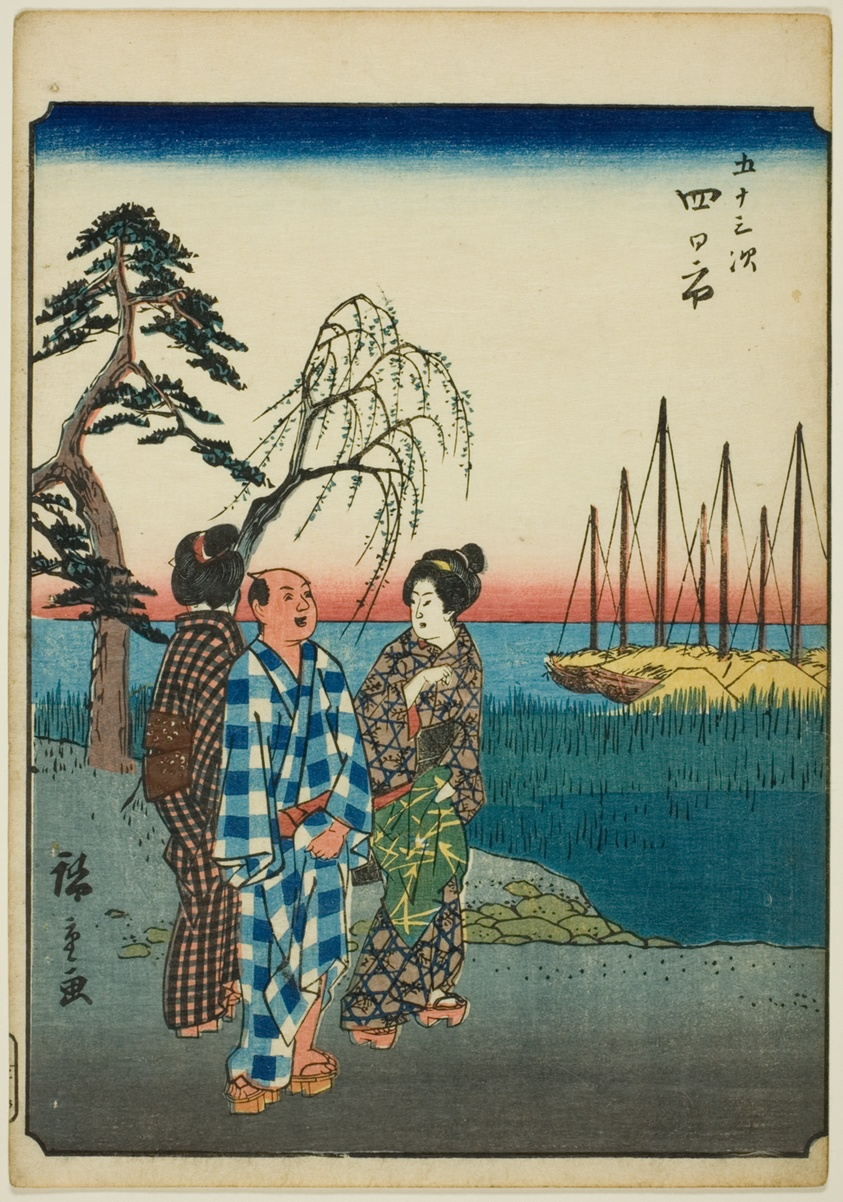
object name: Print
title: Yokkaichi, from the series "Fifty-three Stations [of the Tokaido] (Gojusan tsugi)," also known as the Figure Tokaido (Jinbutsu Tokaido)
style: Japanese (culture or style)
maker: Utagawa Hiroshige 歌川 広重; Japanese, 1797-1858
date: 1852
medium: Color woodblock print; chuban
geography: Japan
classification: woodblock print; print